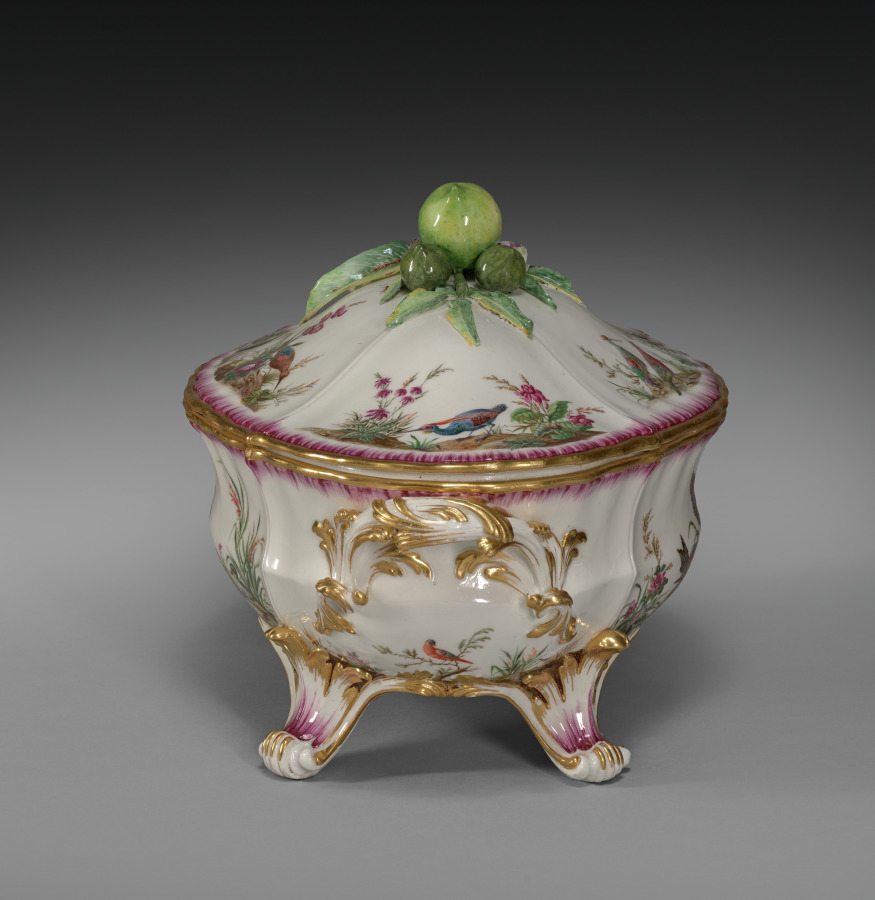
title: Covered Tureen (Terrine ancienne or Terrine ordinaire)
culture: France, Vincennes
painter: attributed to Louis-Denis Armand (French, active c. 1745–1783)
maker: Vincennes Porcelain Factory (France, 1740–56)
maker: probably by Jean-Claude Duplessis le Père (French, 1690–1774)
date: c. 1752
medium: soft-paste porcelain with enamel and gilt decoration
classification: Ceramic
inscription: [Interlaced foliate 'L's surmounted by a fleur-de-lys (indicating royal commision), in blue]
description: The intricately painted birds that decorate this tureen are the work of Louis-Denis Armand. Armand was known for his depictions of birds and landscapes, a specialty that may have come from his work as a painter of lacquered furniture with similar compositions. This tureen was likely designed by master goldsmith Jean-Claude Duplessis who began working as an artistic director at the Vincennes Porcelain Factory in 1748.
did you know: This object was manufactured in soft-paste porcelain, a material used by many European porcelain factories before they were able to emulate the hard-paste porcelain of China and Japan.